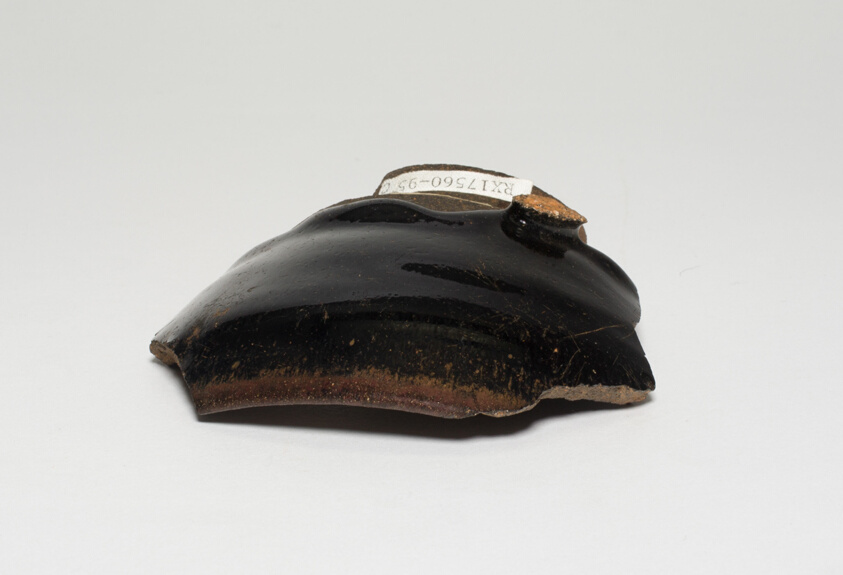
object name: Vessel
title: Fragmentary Bowl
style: Chinese (culture or style)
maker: China, Fujian Province, Jian ware kiln site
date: Song dynasty (960–1279), 12th/13th century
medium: Jian ware; stoneware with "hare's fur" glaze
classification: bowl; dish (vessel); ceramics; vessel